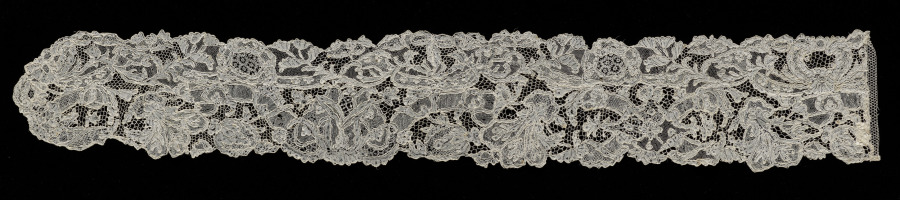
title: Lace Lappet (one of a pair)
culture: France, Alençon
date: 1715–74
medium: Linen: needle lace (Point d'Alençon)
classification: Lace